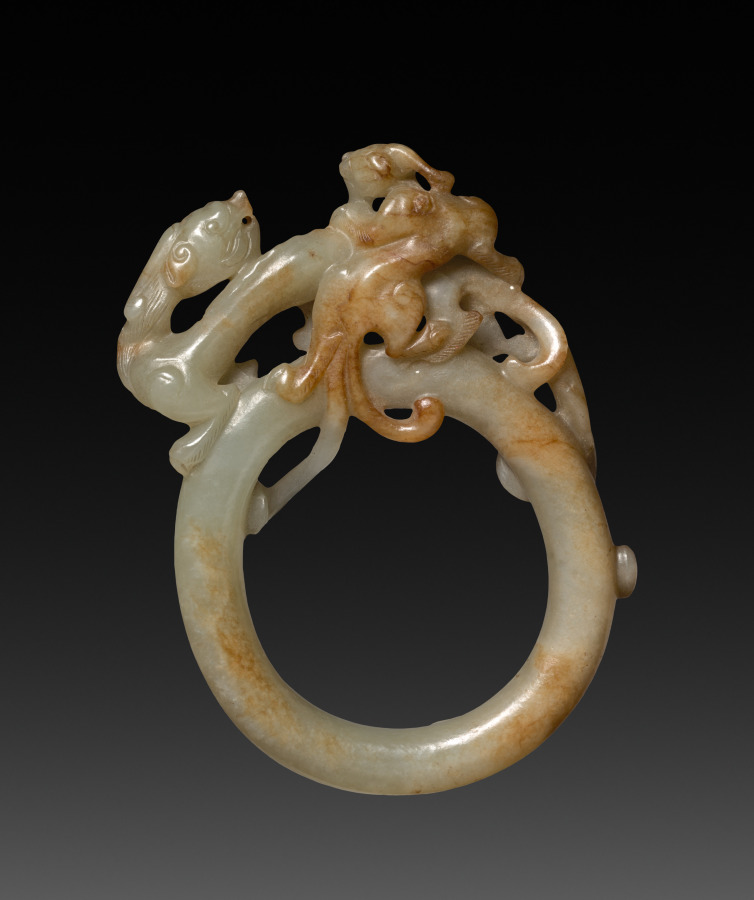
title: Ring with Carved Dragons (Ch'ih)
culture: China, Six Dynasties period (220–589 CE)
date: 400s CE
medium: jade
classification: Jade